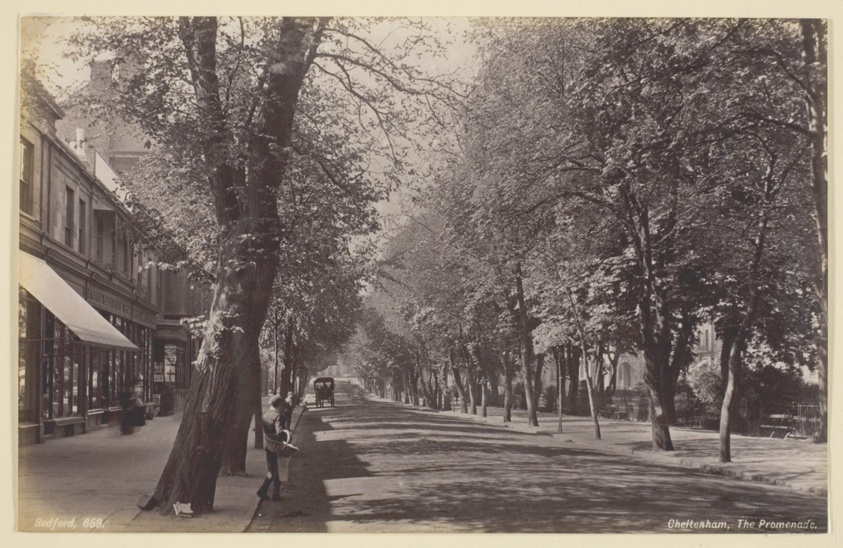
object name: Photograph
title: Cheltenham, the Promenade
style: 19th century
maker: Francis Bedford (English, 1816–1894)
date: 1860/94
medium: Albumen print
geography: England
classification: albumen silver print; photographic process; photography; photograph